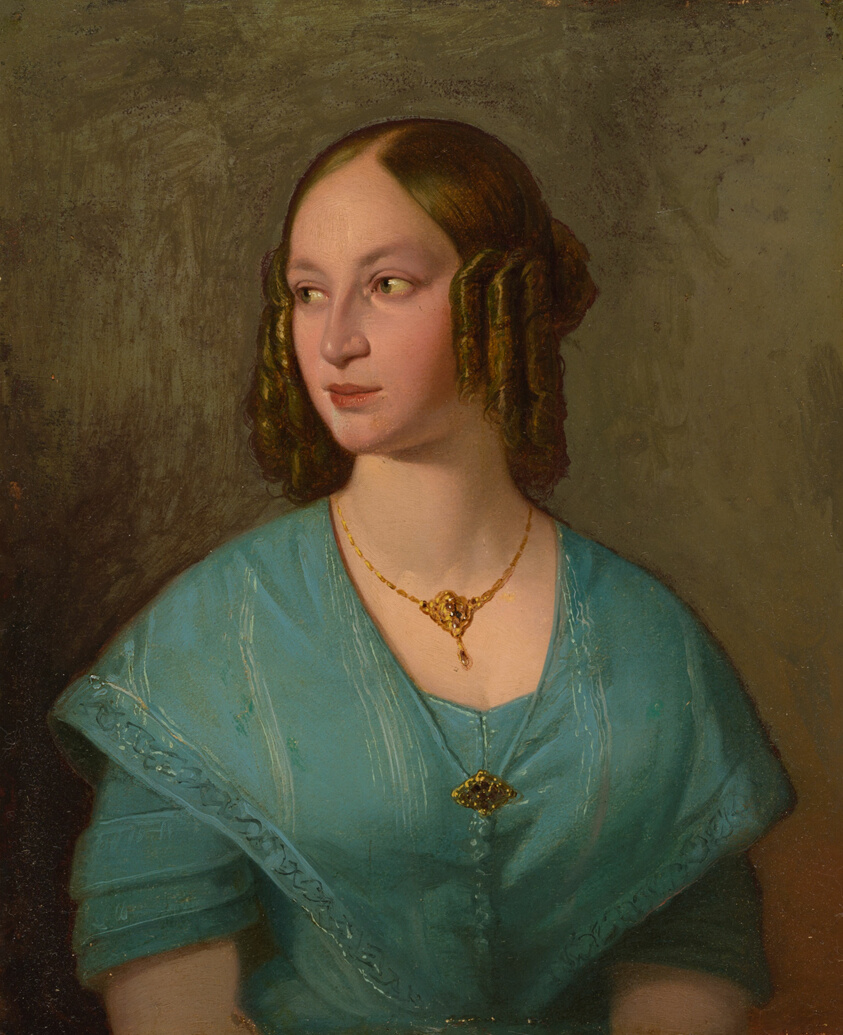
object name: Painting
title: Mrs. Daniel Embury (Emma Catherine Manley)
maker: Artist unknown (American, 19th century)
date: 1837–63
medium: Oil on board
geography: United States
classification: painting; american arts